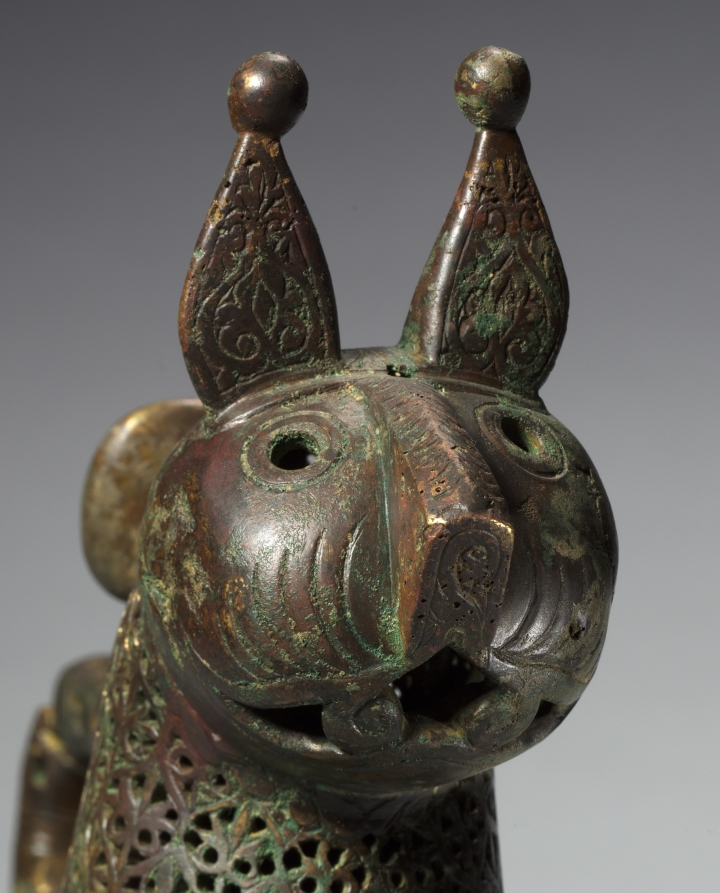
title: Feline Incense Burner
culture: Iran, Khurasan, Seljuq period of Iran (1037–1194)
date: 1150–1200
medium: Copper alloy, cast, engraved, chased, and pierced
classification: Metalwork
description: In Iran during the 1000s and 1100s, vessels in the shape of animals gained popularity, especially as incense burners. Felines were favored in Persian art and this piece may represent a caracal, a type of lynx. The head of the creature was cast separately and is removable to fill its body with hot coals and incense. Qur’anic verses on the neck and spine remind worshippers to set work aside, attend prayer, and then disperse to seek God’s bounty. The diffusion of perfumed smoke through the burner’s pierced palmette design may have served as a sensorial reminder of this teaching.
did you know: Arabic inscriptions in Kufic script against a background of scrolling arabesques run along the back and neck of the feline form.